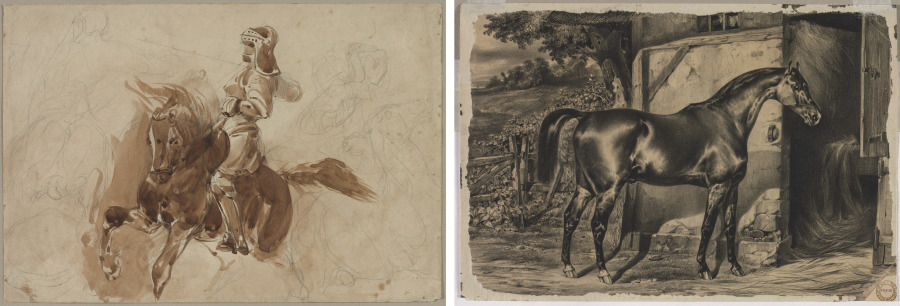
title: Armored Figure on Horseback (recto); Horse in Front of a Barn (verso)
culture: France, 19th century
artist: Eugène Delacroix (French, 1798–1863)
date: c. 1828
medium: graphite and brush and brown wash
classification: Drawing